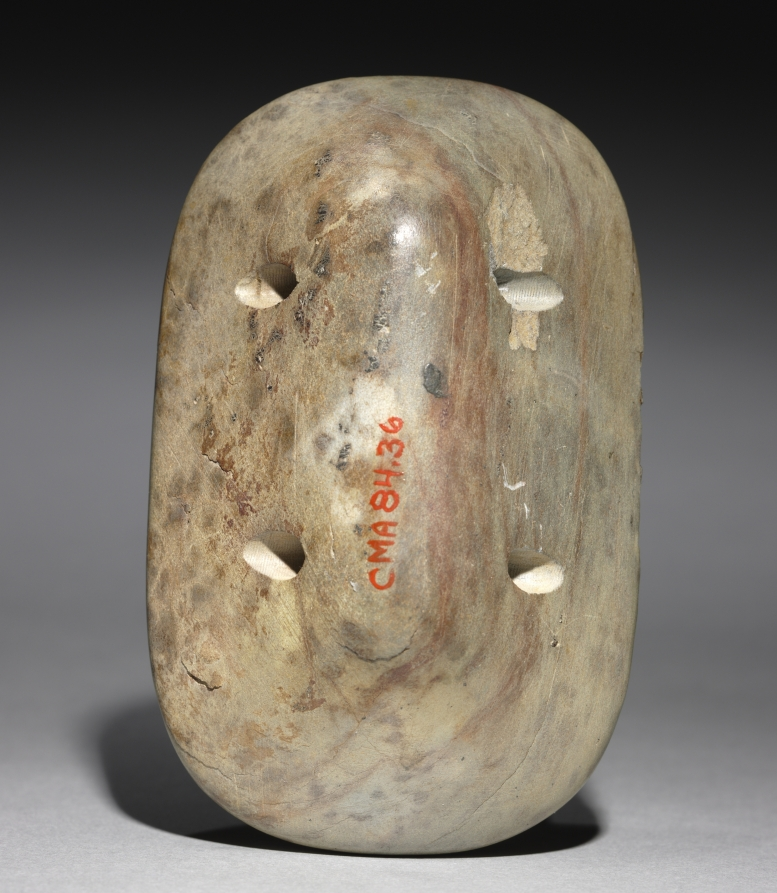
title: Wild Bull Hunt Scarab of Amenhotep III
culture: Egypt, New Kingdom (1540–1069 BCE), Dynasty 18, reign of Amenhotep III (1390–1352 BCE)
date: c. 1391–1353 BCE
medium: steatite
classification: Scarabs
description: Large commemorative scarabs are characteristic of Amenhotep III’s reign. About 200 are known, and all are inscribed with texts on their undersides, recording significant events in the life of the king and queen. This particular scarab is one of only 5 known examples that describe a royal bull hunt undertaken in his second year of rule, in which the king killed 96 bulls. More than just a pastime, the king’s success as a hunter symbolized the triumph of royal order over the forces of nature and chaos.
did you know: The variation in tone appears to be related to inclusions and pigmentation in the stone.